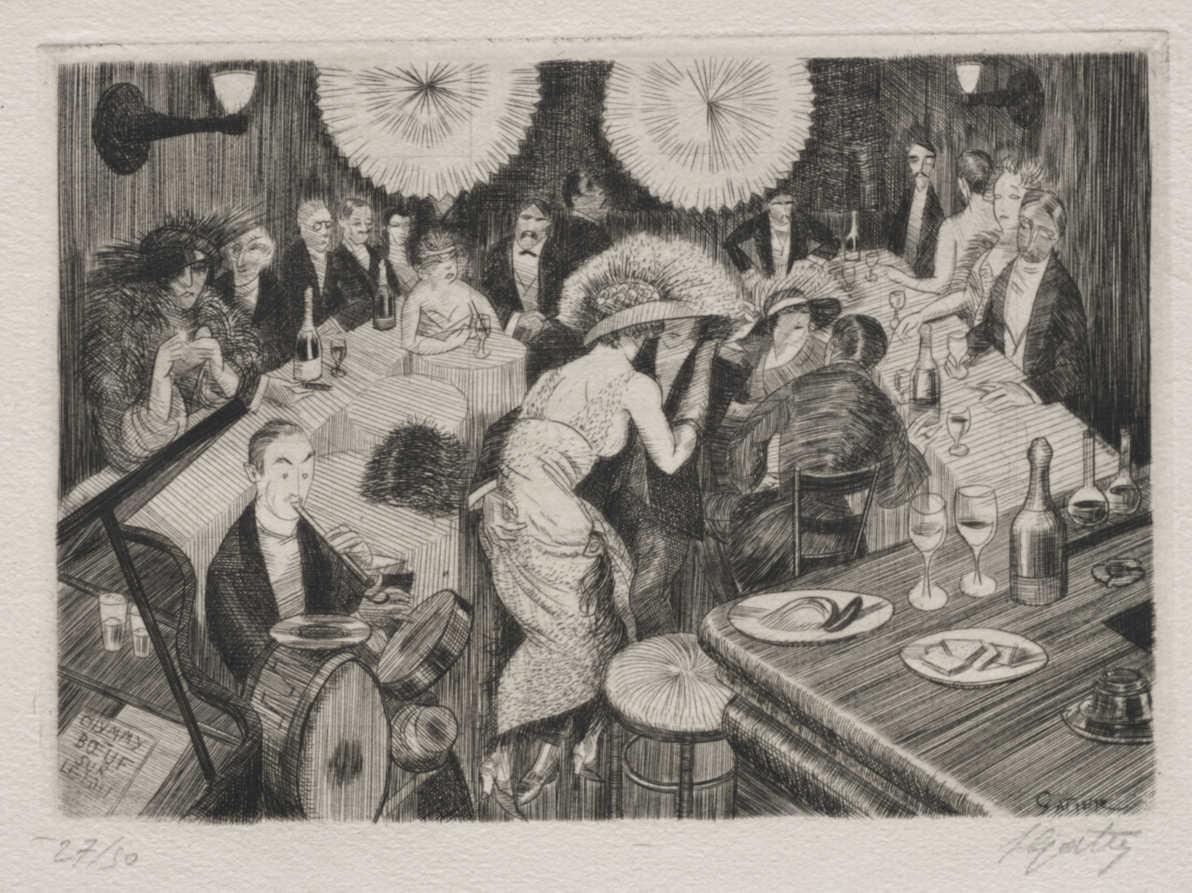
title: Boeuf sur le Toit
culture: France, 20th century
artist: Pierre Louis Gatier (French, 1878–1944)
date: c. 1923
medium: etching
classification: Print